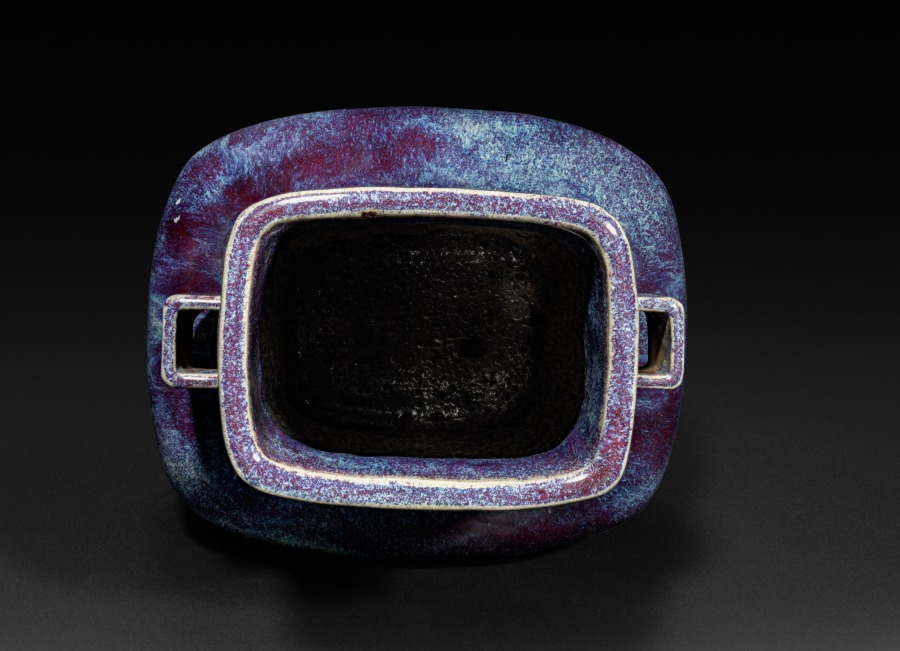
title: Flambé Vase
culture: China, Qing dynasty (1644–1911)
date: 1644–1911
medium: porcelain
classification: Ceramic